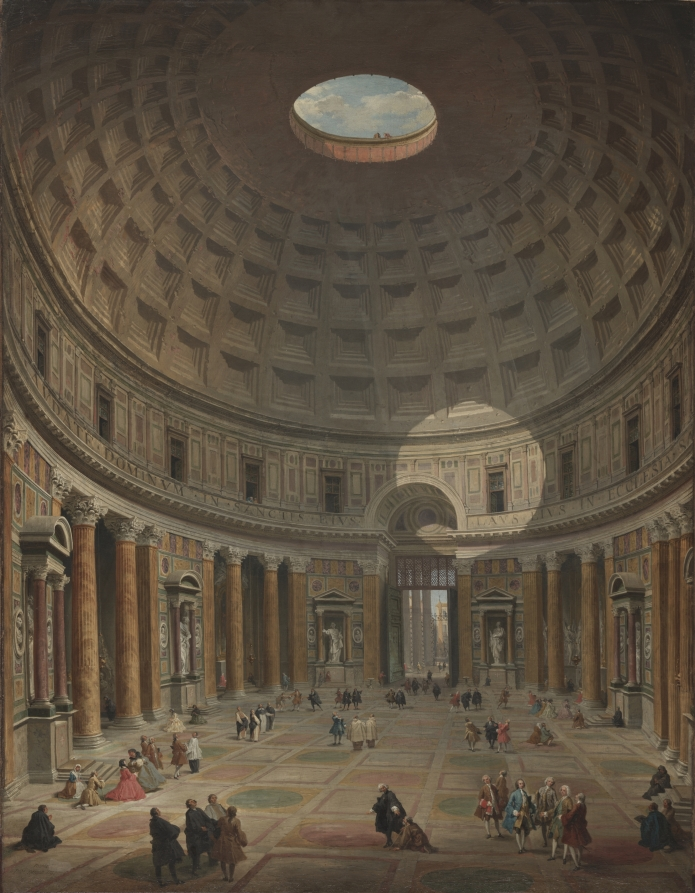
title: Interior of the Pantheon, Rome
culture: Italy, 18th century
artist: Giovanni Paolo Panini (Italian, 1691–1765)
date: 1747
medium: oil on canvas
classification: Painting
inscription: Signed lower left: "ROMAE / [I] P. PANINI. 1747."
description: Created as a temple under the Roman emperor Hadrian around the year AD 125, the Pantheon became a Christian church in 609. Significant restoration took place in the early 1700s, a period of renewed attention to early Christian monuments. The site was a major monument of antiquity, an active church, and its portico, visible through the door, held the most important art fair in the city. Panini shows the complexity of this public space by representing foreign tourists, local churchgoers, Roman nobles, and artists mingling under the dome.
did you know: Panini's depictions of contemporary and ancient Rome were popular with foreigners who visited the city on their Grand Tours.